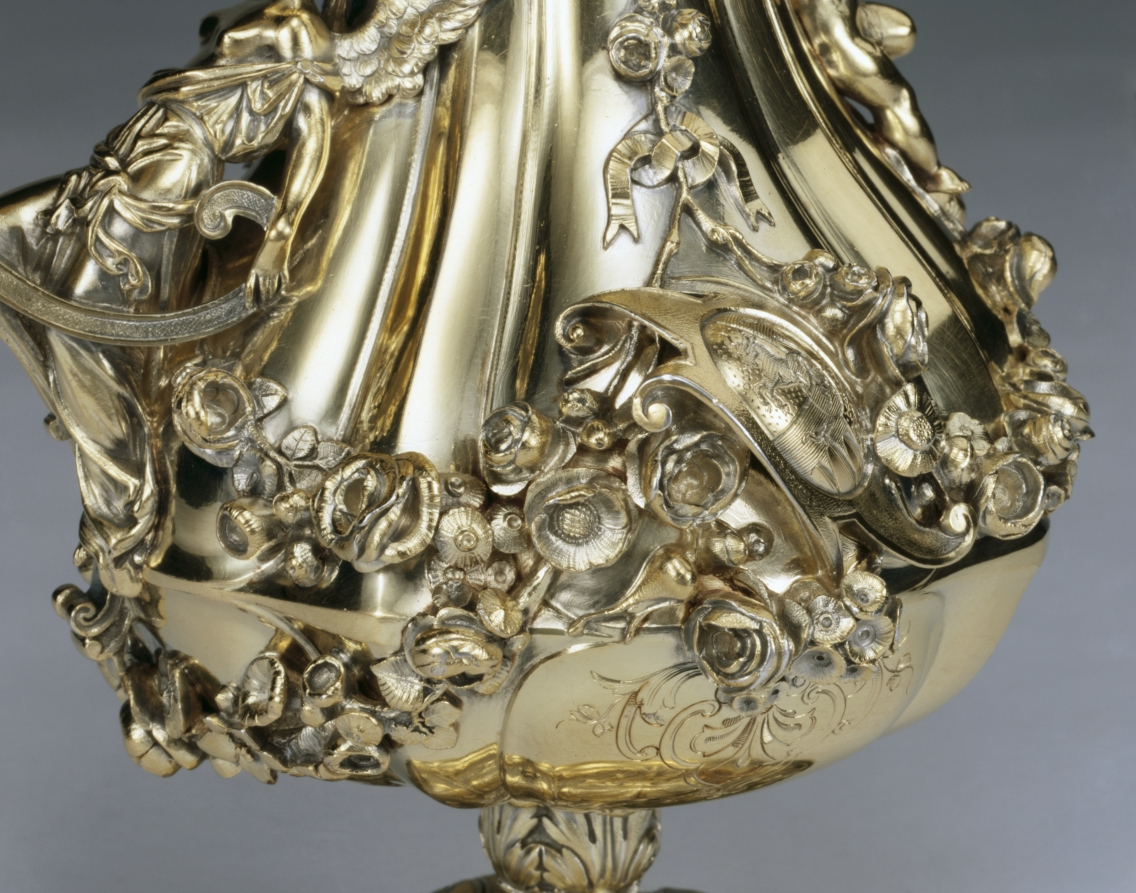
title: Covered Jug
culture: France, 19th century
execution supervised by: Jean-Valentin Morel (French, 1794–1860)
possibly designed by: Jules Dieterle (French, 1811–1889)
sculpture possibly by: Jules Klagmann (French, 1810–1867)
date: c. 1845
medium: gilded silver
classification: Silver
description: The elegance and richness of this ewer demonstrate the high level of technical mastery achieved by its maker. Morel studied under his father, a Parisian lapidary (someone who cuts, polishes, and engraves hard stones), and with Adrien Vachette, a maker of gold boxes. In 1842 he went into partnership with Charles-Edmond Duponchel, which lasted until the late 1840s, at which time he established himself in London, remaining there until 1852, when he returned to Paris. Morel frequentlyfollowed the designs of others, and it has been suggested that in the case of this pitcher his well-known contemporary, Jules Dieterle (1811-1889), may have conceived the overall form. The female figure seems to have been based on a design by the sculptor Jules Klagmann (1810-1867).